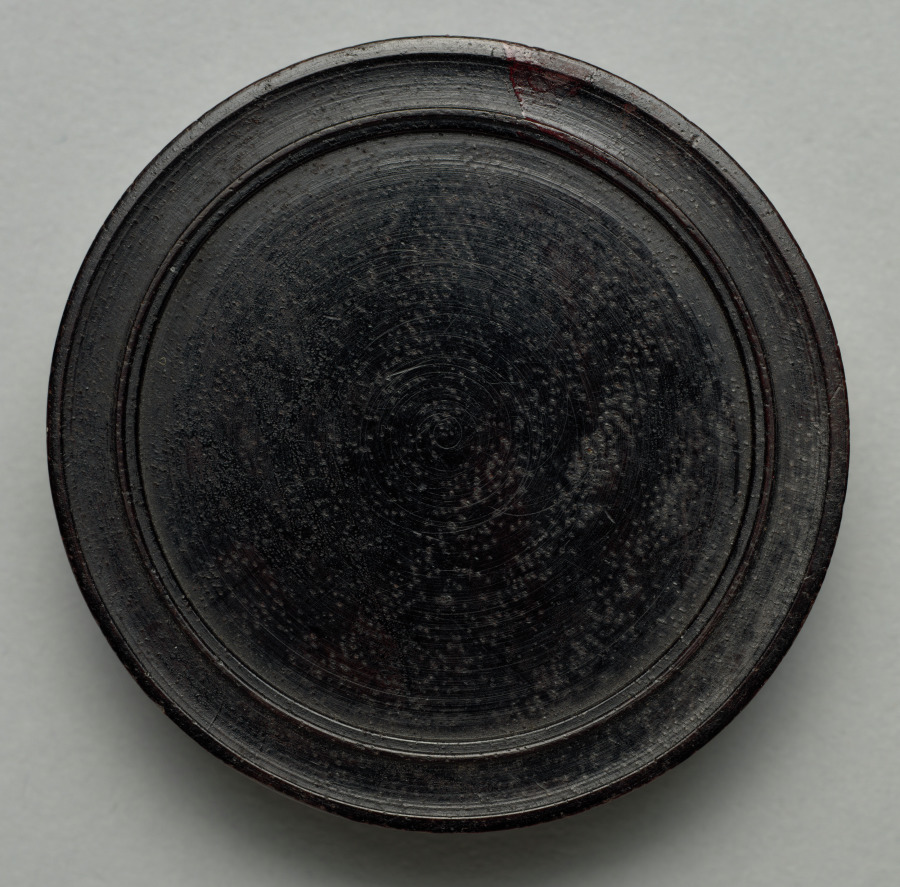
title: Gaming Piece (reverse)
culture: Germany, late 17th-early 18th Century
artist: Martin Brunner (German, 1659–1725)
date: c.1700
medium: wood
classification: Furniture and woodwork